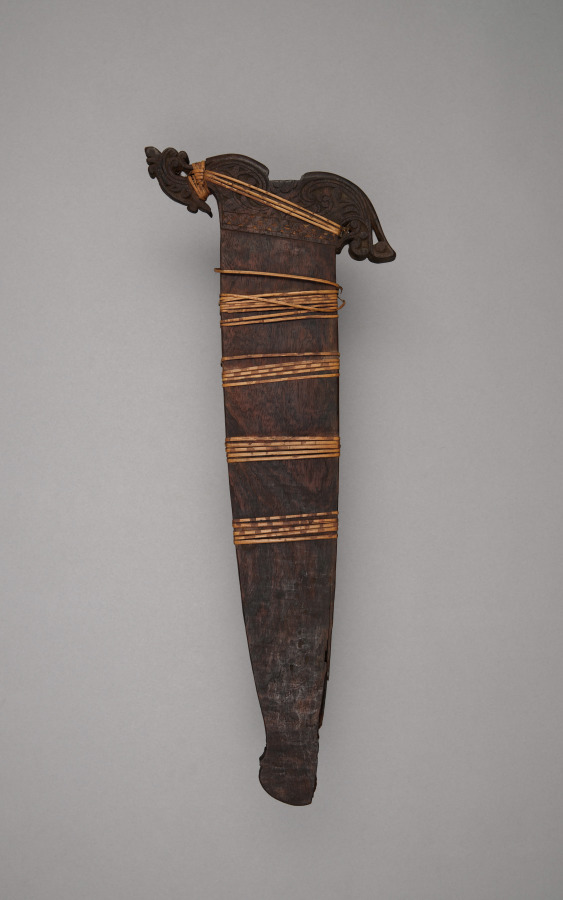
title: Scabbard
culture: Philippines, Mindanao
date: 1800s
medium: Wood with rattan strips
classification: Arms and Armor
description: The flared form of this wooden scabbard indicates that it was made to house a barong blade that would have belonged to members of a Muslim group in the southern Philippines, the Maranau, Tausug, or Yakan. The upper section features incised scroll-like motifs, similar to the stylized floriate designs common in southern Philippine okir carving traditions. Several bands of rattan lashings reinforce the sheath, adding both structural stability and decorative rhythm.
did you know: The scrolling motifs traveled with Islamic people by way of maritime trade.